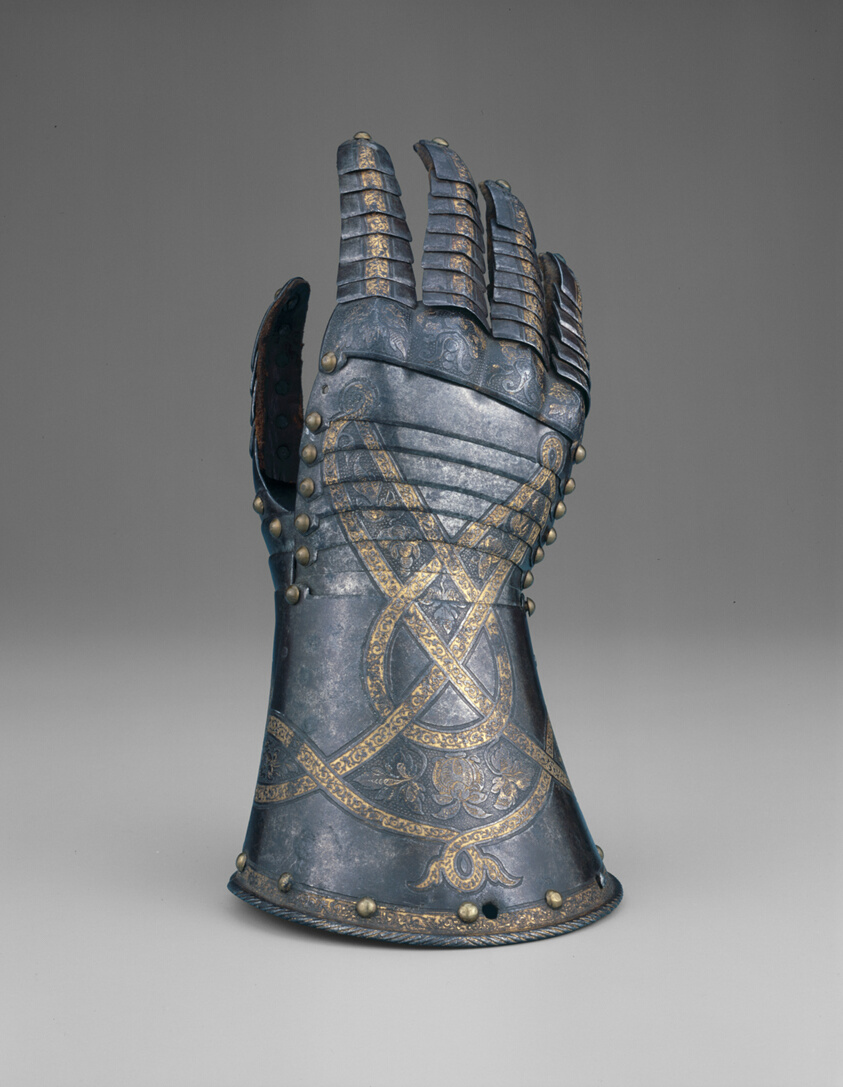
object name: Armor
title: Gauntlet from a Tournament Garniture of a Hapsburg Prince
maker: Attributed to Anton Peffenhauser; (German 1525—1603) Augsburg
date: 1571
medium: Steel, gilding, brass, and leather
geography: Augsburg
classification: arms and armor; suit-gauntlet; armor